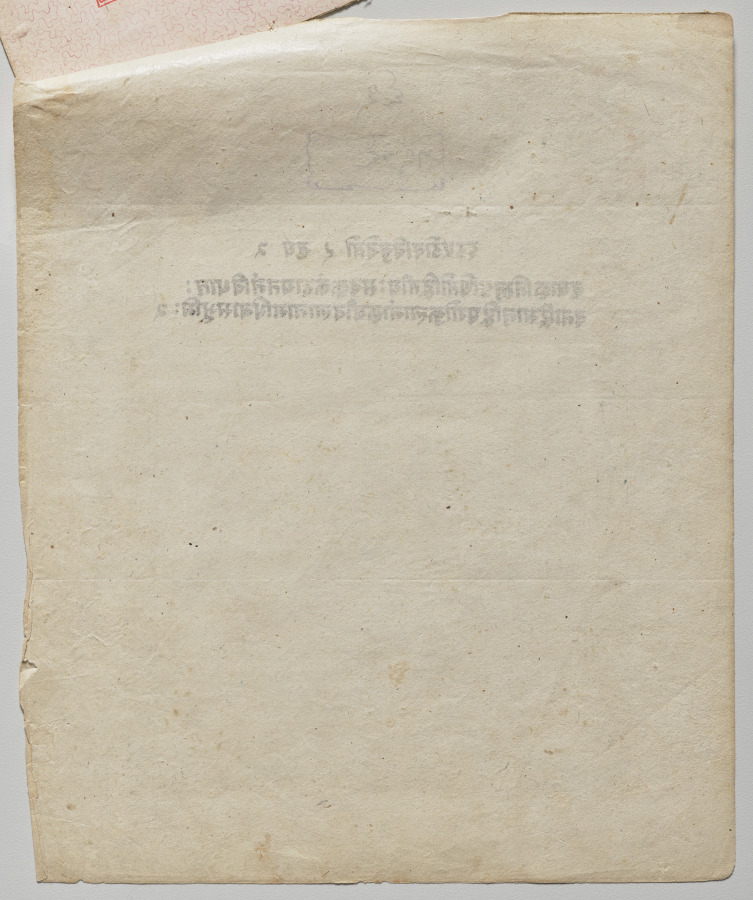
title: Taurus, from a "Mandi Astrology Series"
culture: Northern India, Pahari kingdoms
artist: attributed to Sanju (Indian, active late 1700s–early 1800s)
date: c. 1810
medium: Gum tempera and gold on paper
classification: Painting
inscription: The attached flysheet has a number, verse, and the stamp of the Mandi Royal Library, filled with the number 1296. The series number is 63, with the verse is number 2.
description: Standing for the astrological sign Taurus, the large-scale bull fills the space like a graceful icon behind a much smaller herd of cows. Pure white in color and in perfect profile, he has been adorned with a string of bells, a jeweled diadem, and decorative tips on his horns. A fine textile with gold leafy arabesque patterns sets him apart from oxen, dairy cows, and even the elephants in the distant background.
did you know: The oval format derives from the popularity of British cameos at the Mughal court.